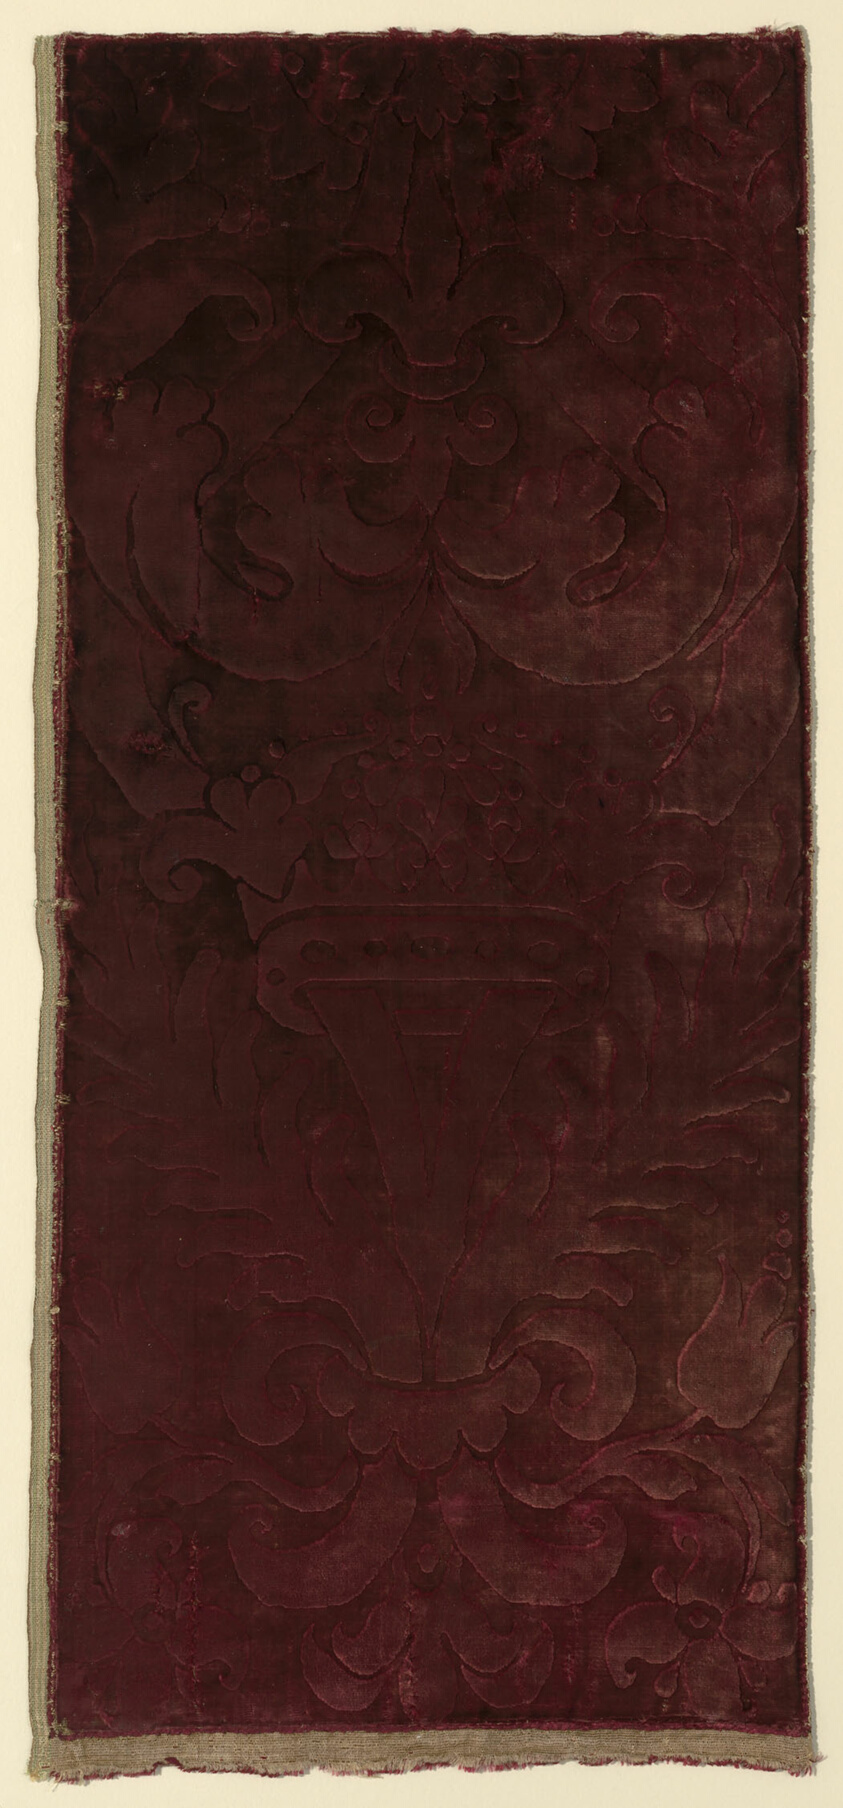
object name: Textile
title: Fragment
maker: Italy, Venice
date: 16th century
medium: Silk, broken warp chevron twill weave cut, pile-on-pile solid velvet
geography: Italy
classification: textile; weaving - velvet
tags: chevrons